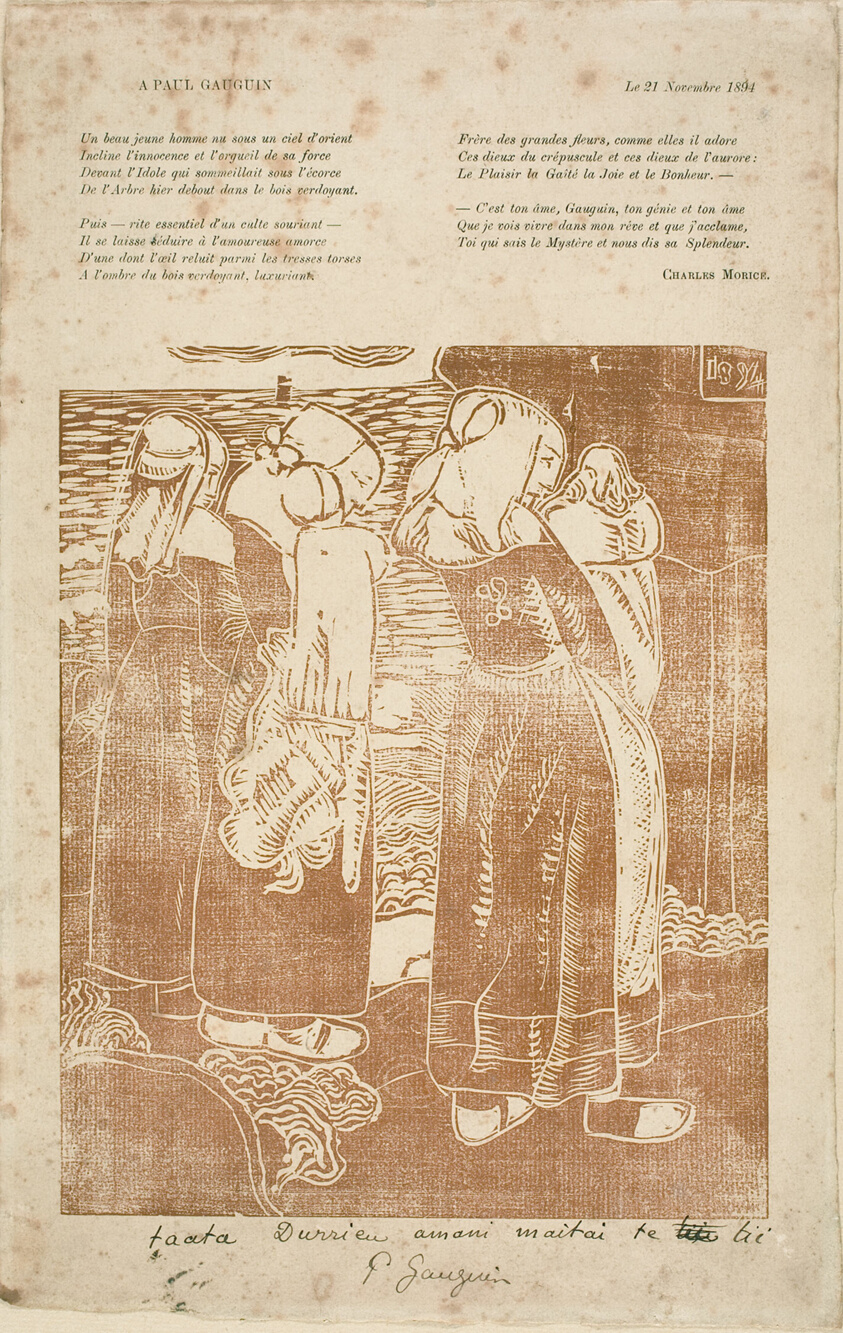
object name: Print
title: Three Breton Women with Infants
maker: Armand Séguin (French, 1869-1904); inscribed by Paul Gauguin (French, 1848-1903); poem by Charles Morice (French, 1861-1919)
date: 1894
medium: Woodcut in brown ink with letterpress above on discolored ivory laid paper hinged to tan laid paper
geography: France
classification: woodcut; print; prints and drawing